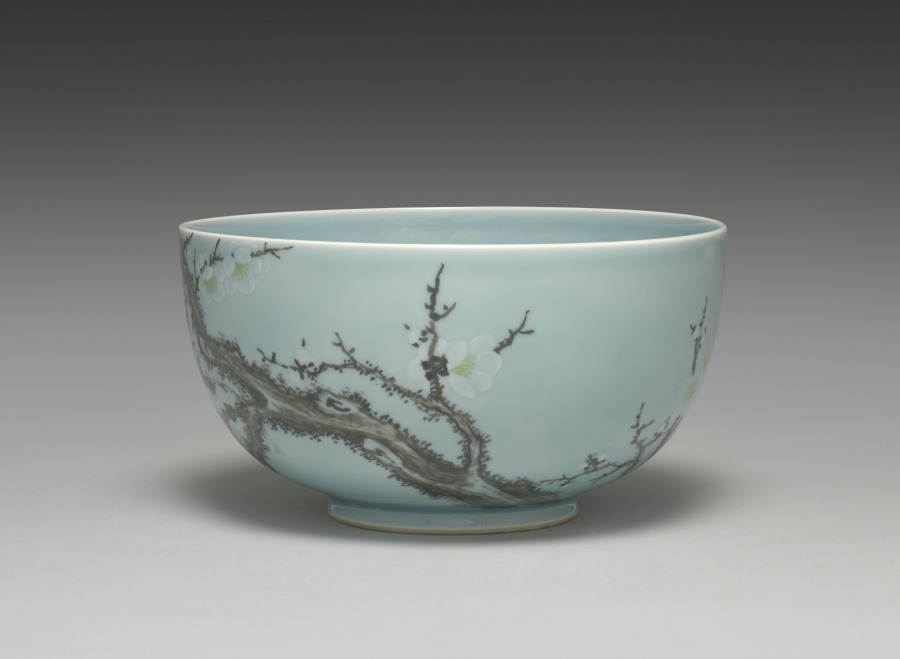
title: Sweets Bowl with Plum Tree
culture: Japan, Taishō period (1912–26) to Shōwa period (1926–89)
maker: Seifū Yohei IV (Japanese, 1872–1951)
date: 1914–46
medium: Porcelain with underglaze color and modeled design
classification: Ceramic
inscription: 清風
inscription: 清風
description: In Chinese culture, the plum symbolizes the virtue of perseverance. For his sweets bowl based on Qing dynasty (1644–1911) Chinese prototypes, Seifū Yohei IV first painted the gnarled boughs of a plum tree in iron oxide on the surface. Then he made the tree’s blossoms slightly raised by building up slip, or liquified clay. He painted their centers yellow. Before applying the blue glaze, he covered the blossoms with paper so that they remained white.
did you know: Broad access to high-quality Chinese ceramics occasioned by the collapse of the Qing dynasty (1644–1911) and the dispersal of elite Chinese collections presented Seifū Yohei IV with models for both molded decoration and painted motifs.